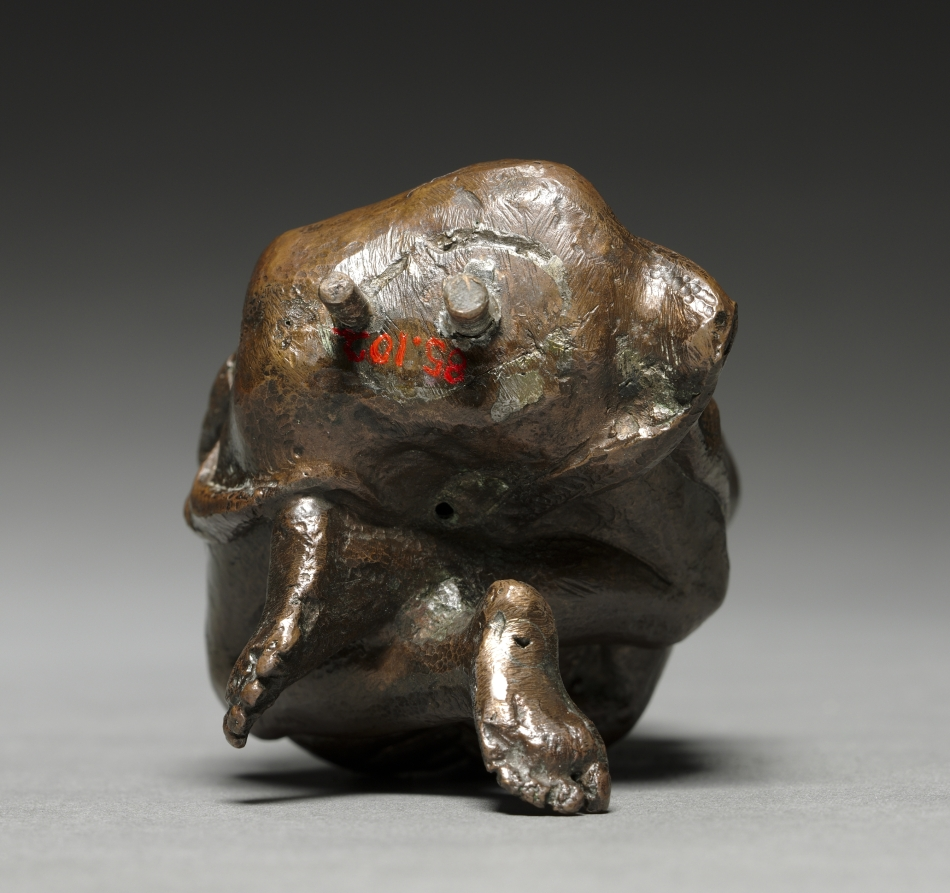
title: Seated Boy Clothed with Goat Skins Holding an Open Barrel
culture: Italy, Padua, 16th century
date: c. 1525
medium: bronze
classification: Sculpture